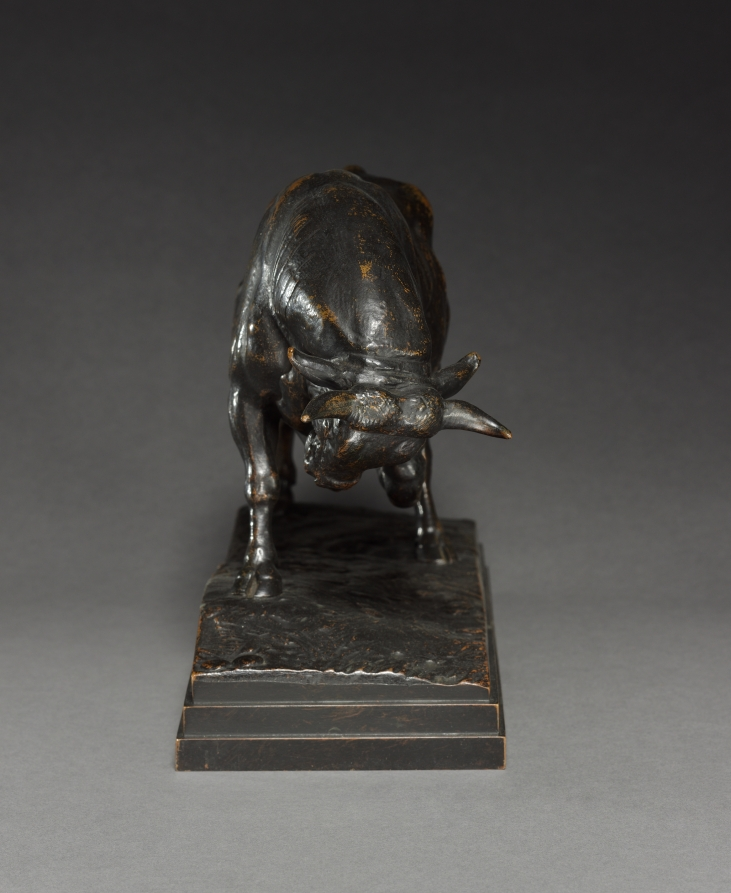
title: Bull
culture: France, 19th century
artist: Antoine-Louis Barye (French, 1796–1875)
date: c. 1841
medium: bronze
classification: Sculpture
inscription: Signed: "Barye"